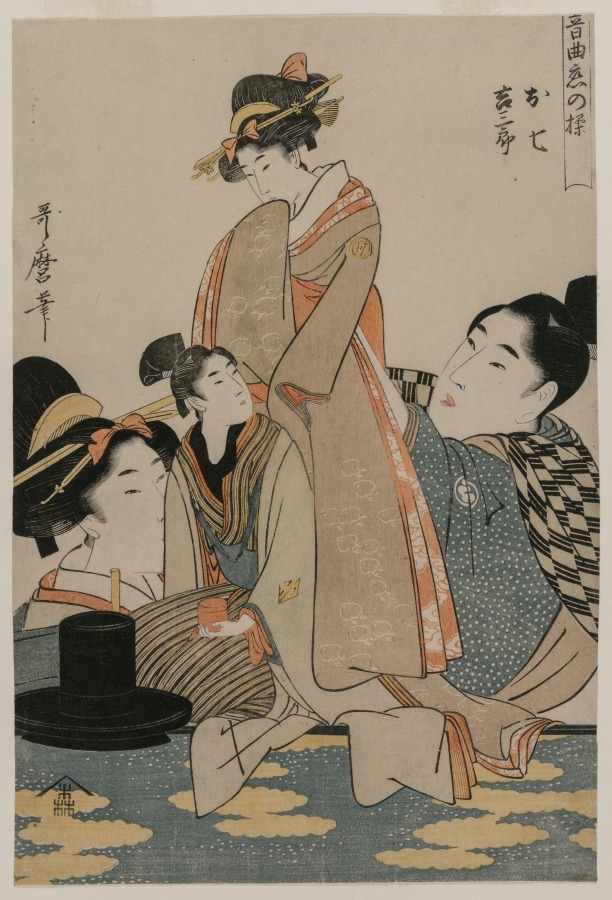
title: Oshichi and Kichisaburo (from the series Music on the Theme of Constancy in Love)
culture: Japan, Edo period (1615–1868)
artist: Kitagawa Utamaro (Japanese, c. 1754–1806)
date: c. 1800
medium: color woodblock print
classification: Print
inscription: Artist's signature: Utamaro hitsu.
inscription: Publisher: Moriya Jihei (emblem).